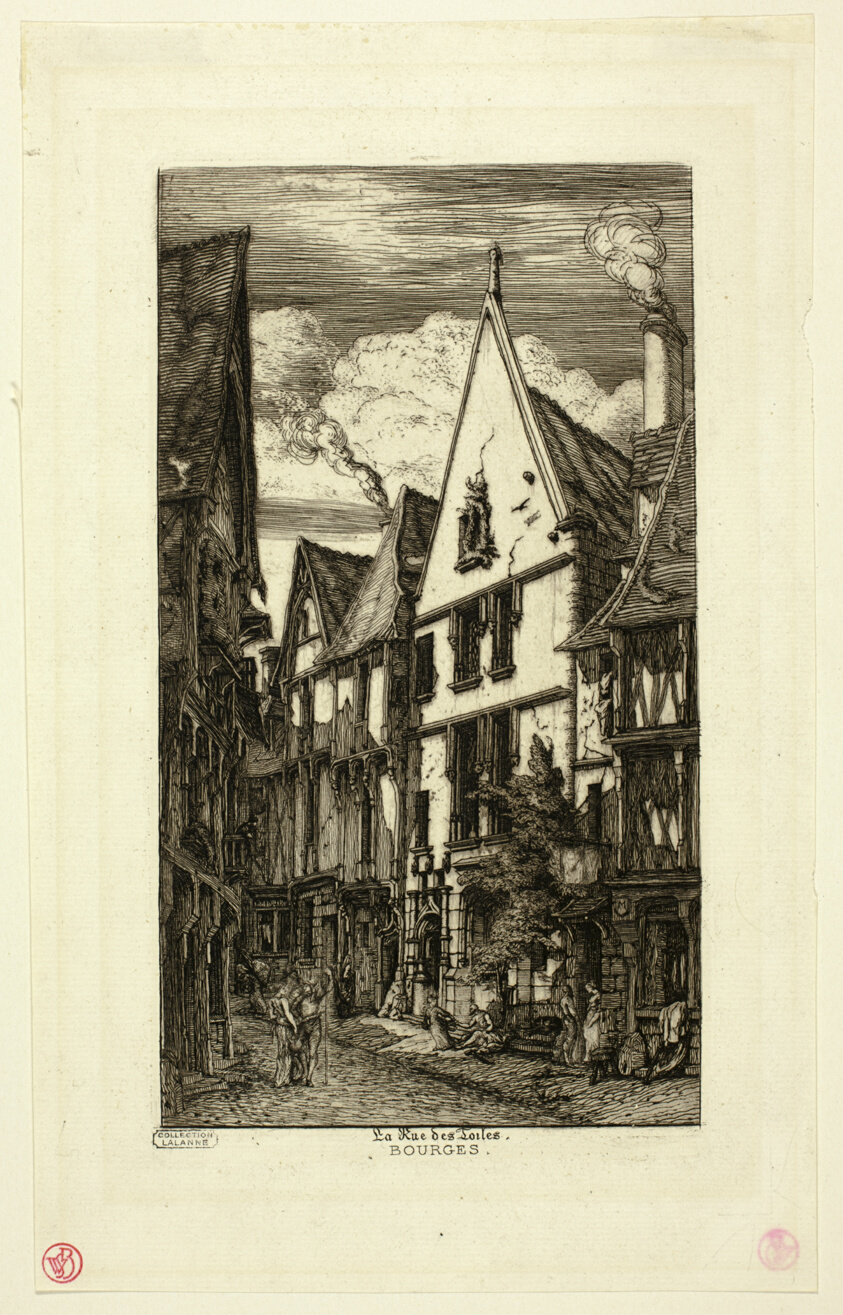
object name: Print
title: Rue des toiles, Bourges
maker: Charles Meryon (French, 1821-1868)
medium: Etching on paper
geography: France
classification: etching; print; prints and drawing